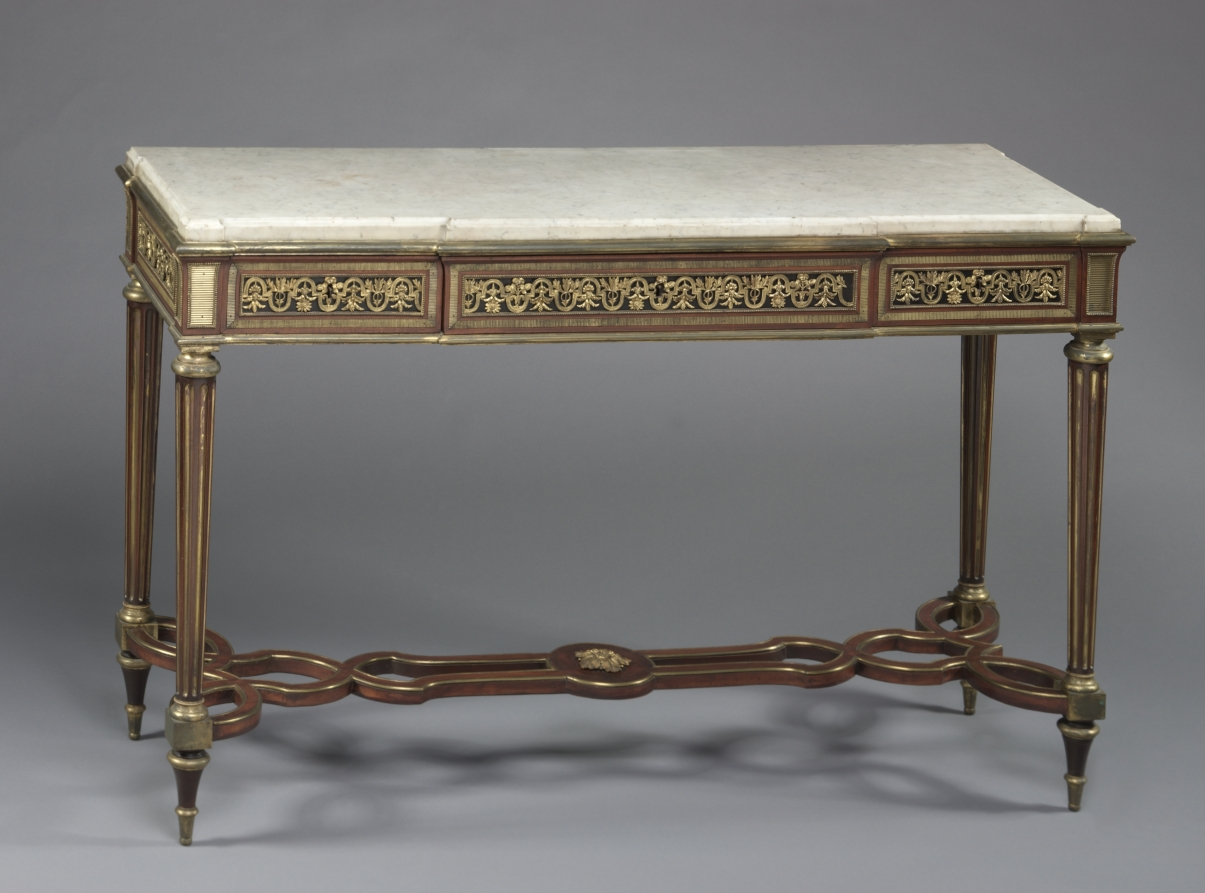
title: Table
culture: France, 18th century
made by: Adam Weisweiler (French, c. 1750–1810)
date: c. 1780–1790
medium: mahogany, gilt bronze, marble top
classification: Furniture and woodwork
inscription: signed twice on back: Weisweiler.